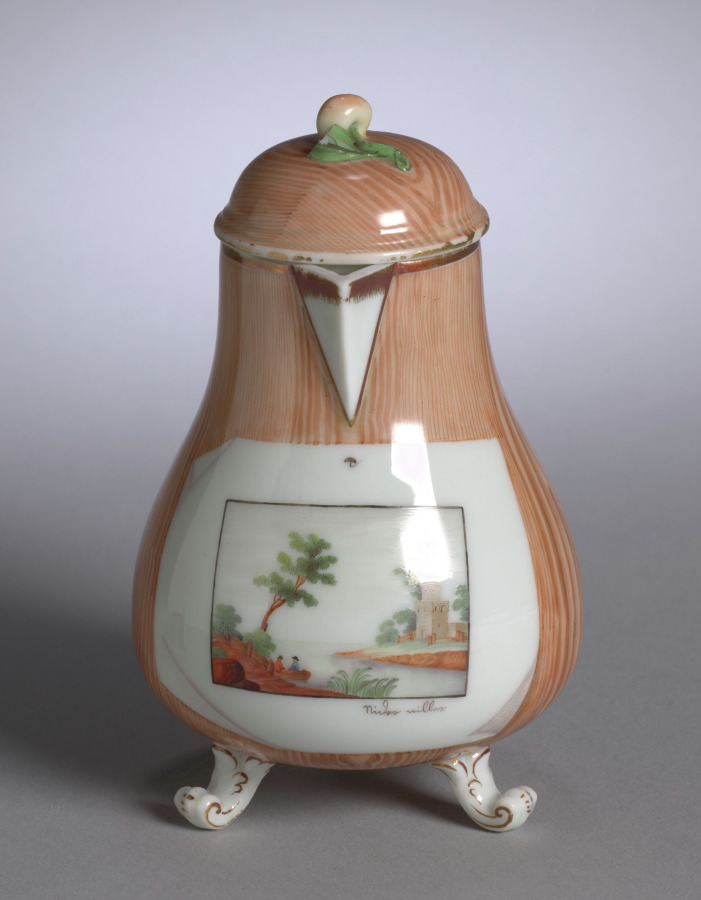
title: Covered Cream Jug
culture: France, 18th century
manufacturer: Niderviller Factory (French)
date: c. 1775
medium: hard-paste porcelain with enamel and gilt decoration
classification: Ceramic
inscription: inscribed at lower right corner of trompe l'oeil print: Niderviller.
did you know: Cream jugs with lids or covers usually held warm cream for coffee or tea.